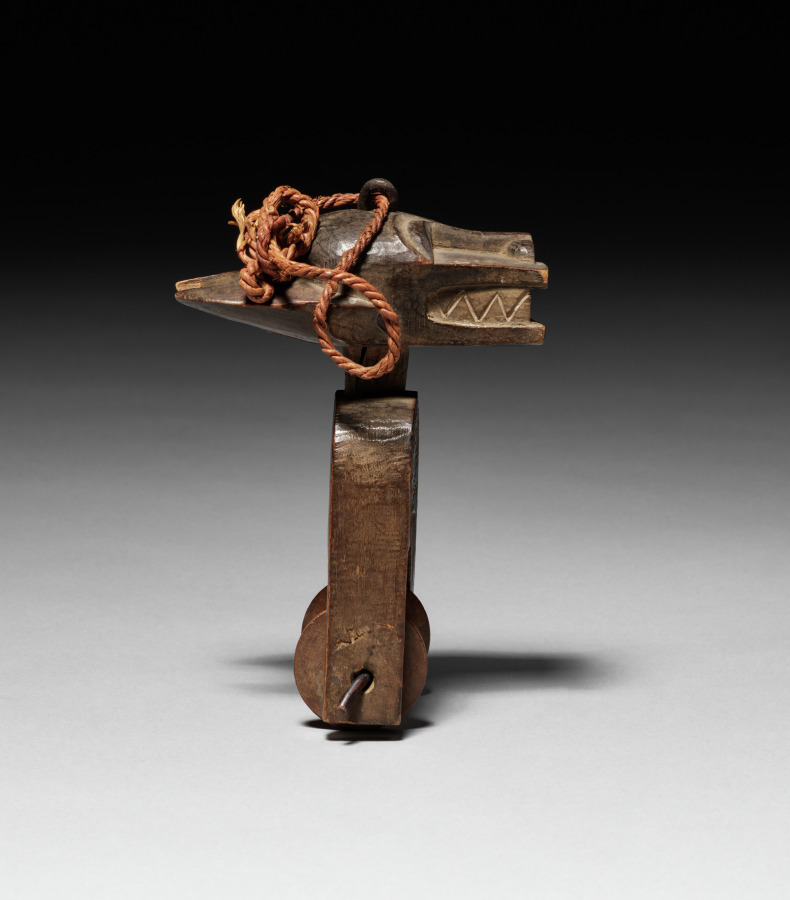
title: Heddle Pulley (Bo Nun Amuin mask)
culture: Africa, West Africa, Côte d’Ivoire, Baule-style carver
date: 1900s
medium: Wood, metal, and plant fiber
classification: Implements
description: The heddle pulley, a working element of a narrow-band loom, bears a miniature sculpture. Heddle pulleys support and separate threads during weaving. Mounted above the weaver, the pulleys allow him to glance up at an object of inspiring beauty, rather than pure functionality. This pulley depicts a face mask, a secular usage of a typically sacred mask type.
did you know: This heddle pulley depicts a fearsome Bo Nun Amuin mask that recalls nature spirits.